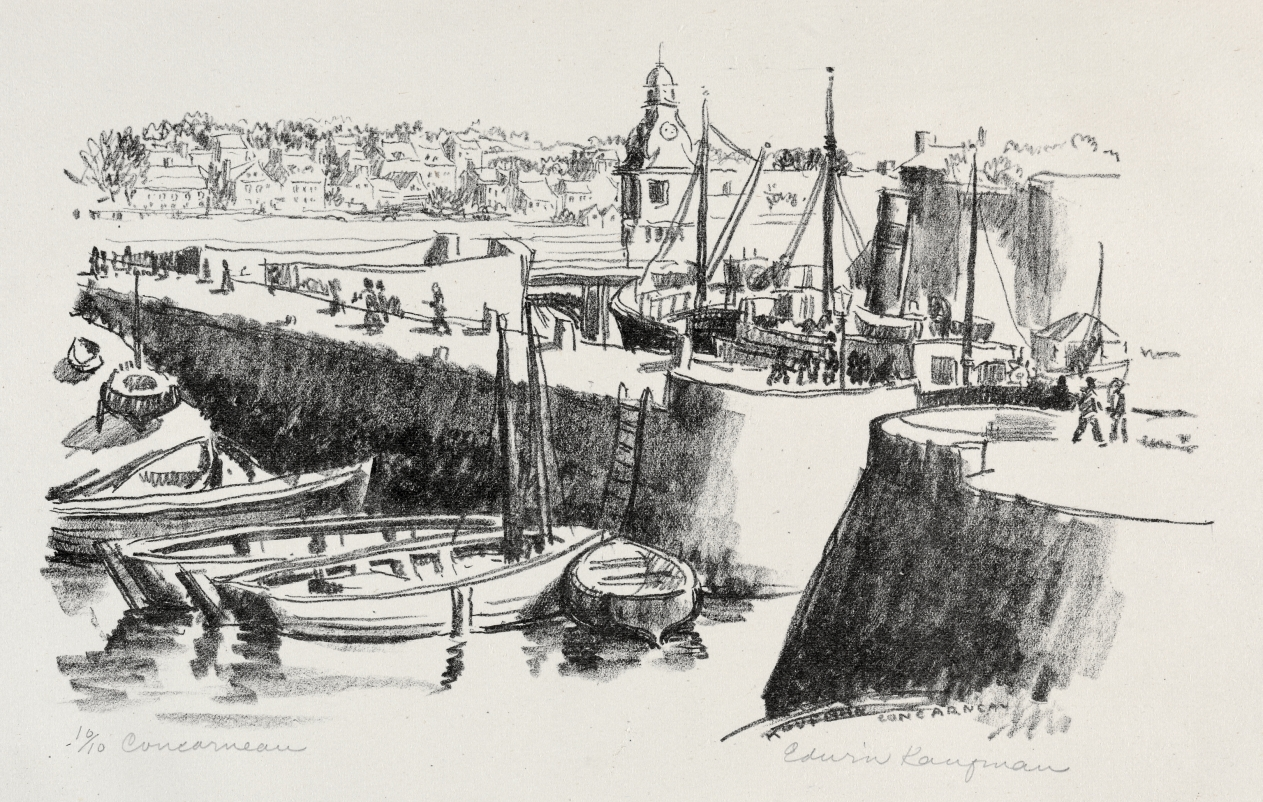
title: Concarneau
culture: America, Ohio, Cleveland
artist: Edwin Kaufman (American, 1906–1939)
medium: lithograph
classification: Print